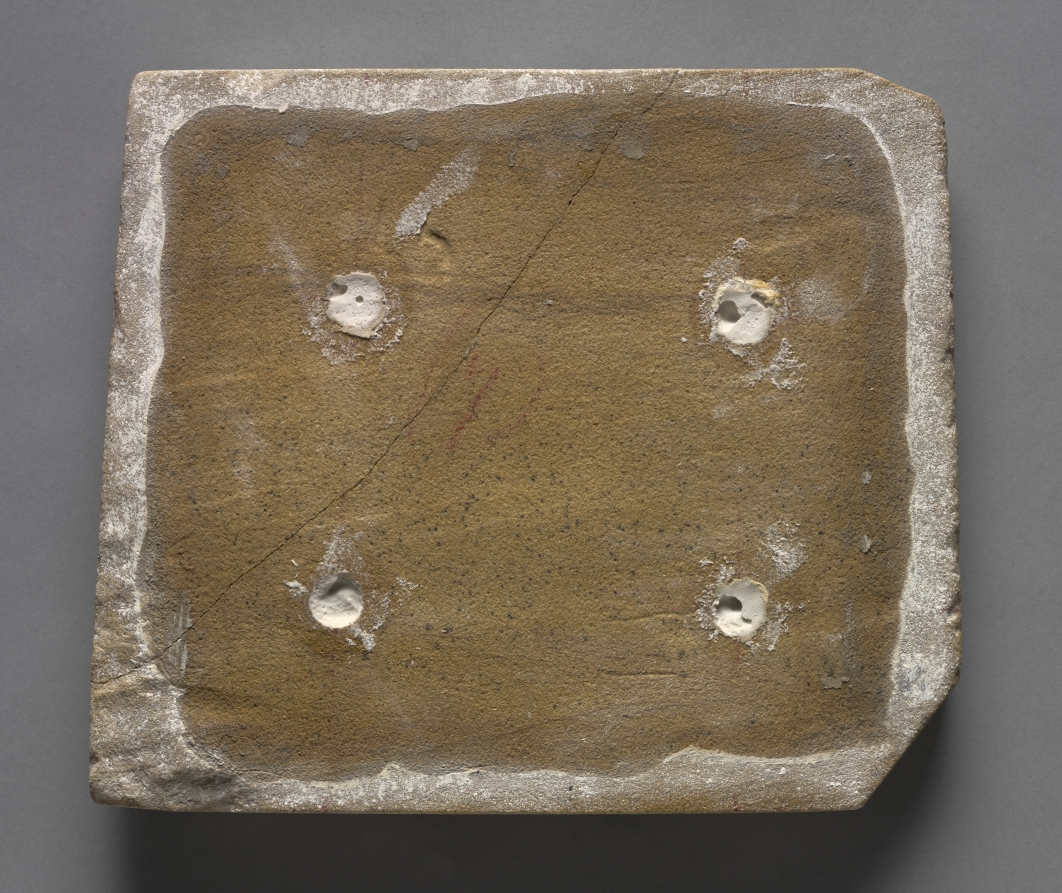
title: Talatat: Portrait of Nefertiti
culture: Egypt, Karnak, New Kingdom (1540–1069 BCE), Dynasty 18, reign of Akhenaten (1351–1334 BCE)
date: c. 1353–1347 BCE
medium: painted sandstone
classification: Sculpture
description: The son of Amenhotep III, Akhenaten, brought about the short-lived "monotheistic" revolution in Egyptian religion near the end of Dynasty 18. The young king constructed a temple complex to the Aten, the Sun Disk, at Karnak—from which this relief comes—before he moved his capital to El Armana. For reasons yet unknown, the figure of the Queen Nefertiti appears in these reliefs far more often than that of the king. Ironically, the Aten temples were dismantled anciently to be used as foundations and fill for additions to the Great Temple of Amun, whom the Aten had briefly displaced.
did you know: Even though all we see is a fragment of the head we know it is Nefertiti by the double uraeus or serpent symbol on the headband, which was only worn by the queen.